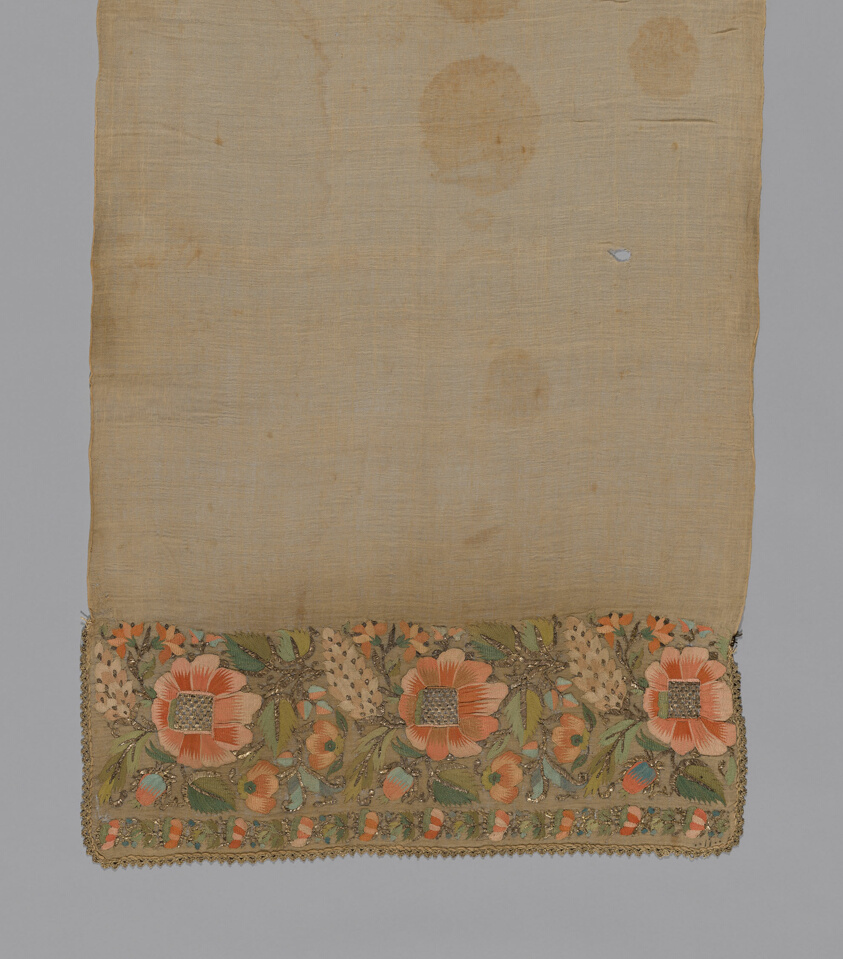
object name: Textile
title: Towel or Napkin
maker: Turkey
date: 19th century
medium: embroidered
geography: Turkey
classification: textile; needlework (visual works); weaving